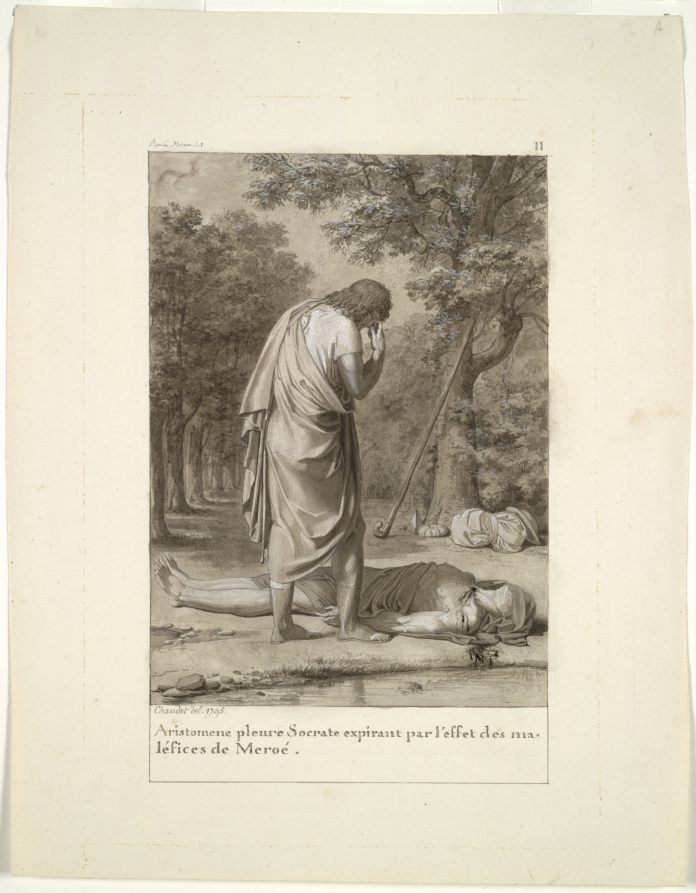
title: Aristomenes Mourning the Death of Socrates from the Bewitchment of Meroë (from Book 1 of Apuleius, "The Golden Ass")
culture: France, 18th century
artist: Antoine-Denis Chaudet (French, 1763–1810)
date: 1795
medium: brush and black and gray wash, heightened with white gouache, over graphite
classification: Drawing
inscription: signed, lower left, in black ink: Chaudet del. 1795.; by artist, upper left, in black ink: Apulée, Metam. v.1; by artist, upper right, in black ink: II; by artist, lower center, in black ink: Aristomene pleure Socrate expirant par l'effet des ma= / léfices de Meroé.; upper right, in graphite: A; verso, upper left, in graphite: [buza?] [underlined] / [Nello?]; upper center, in graphite: 123 / b [circled]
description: This scene represents the end of a complex episode from the Roman writer Apuleius's (2nd century ad) story The Golden Ass. Aristomenes narrates a tale to the book's main character, Lucius, about a friend named Socrates, whom he meets during his travels. After a disastrous affair with a witch named Meroë, Socrates dies from a wound she inflicts to his throat, and the scene shown here is the moment just after his death. Chaudet is mainly known as a sculptor, but he also designed a number of book illustrations for the most important publisher of the neoclassic period, the Didot firm. Although we know he did a number of drawings for The Golden Ass, the project was never realized as a book.